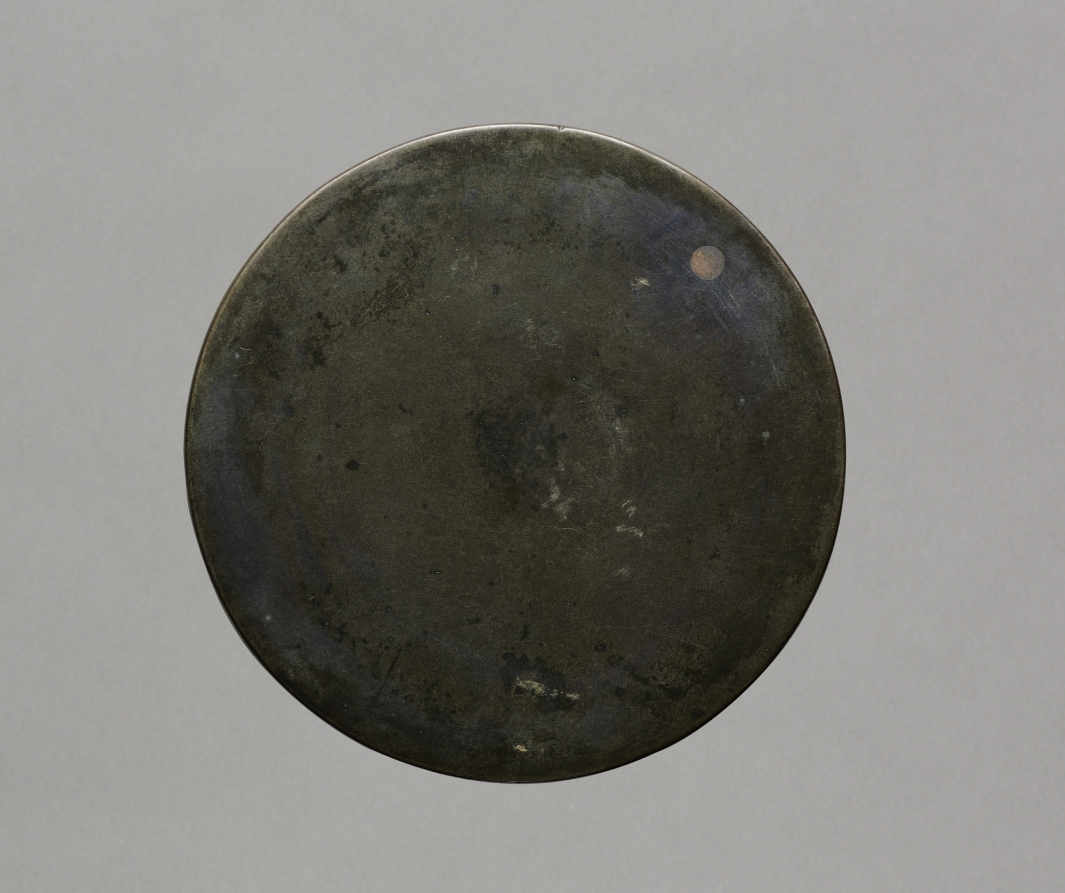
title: Mirror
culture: Japan, Kamakura period (1185–1333)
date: 1200s–1300s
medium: bronze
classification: Metalwork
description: The Japanese used chrysanthemums as decorative elements on mirrors. In the Heian period, a chrysanthemum with cranes or long-tailed birds was a common motif. Later, in the Kamakura and Muromachi periods, chrysanthemum designs were divided into three patterns with different symbolic associations: Chrysanthemum with Cranes represented longevity; Water Flowing suggested longevity as well as the Noh drama Kikujido, or Chrysanthemum Boy; and East Fence alluded to the poem "Drinking Wine" by Tao Yuanming (365–427 CE). Here, the mirror featuring Buddhist iconography (kyojo) and a chrysanthemum design on the back shows that the flower was also appreciated in the context of Buddhism in the Kamakura period.